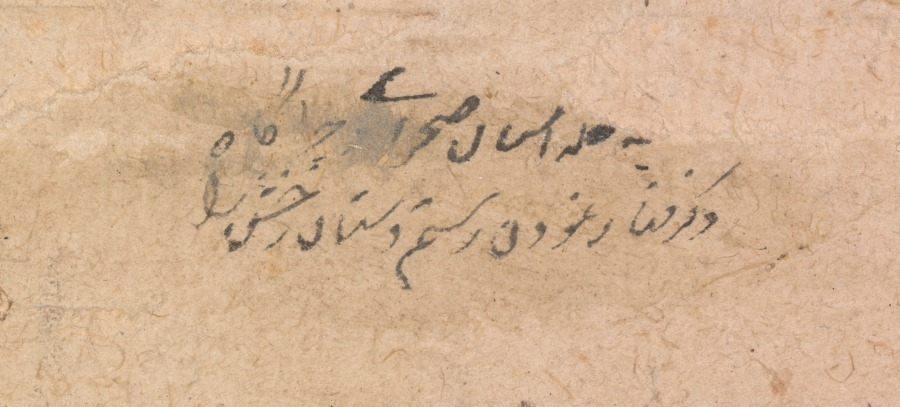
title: A marbled picture of Rustam catching Rakhsh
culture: India, Bijapur, Deccan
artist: attributed to Shafi (Indian, active about 1650)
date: c. 1650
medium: Gum tempera and gold on paper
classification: Painting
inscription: apocryphal inscription lower left: 'amal-i mir Kalan 904 verso: inscription identifying the scene of Rustam capturing Rakhsh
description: This scene depicts the young hero Rustam catching a foal, Rakhsh (meaning “light”), who will be his faithful companion through many adventures. A prophet-like shepherd figure with a staff at the upper left predicts that Rustam will be the savior of Iran. At the top of the page a feline has caught its prey, while a hunter steps on its tail. This extraordinary painting has more applications of marbled colorant than any other known example. Even all the flowers and birds have been articulated through marbling in a feat of registration and control by a master of the technique.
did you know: Even the flowers and insects used as filler in this composition were marbled.